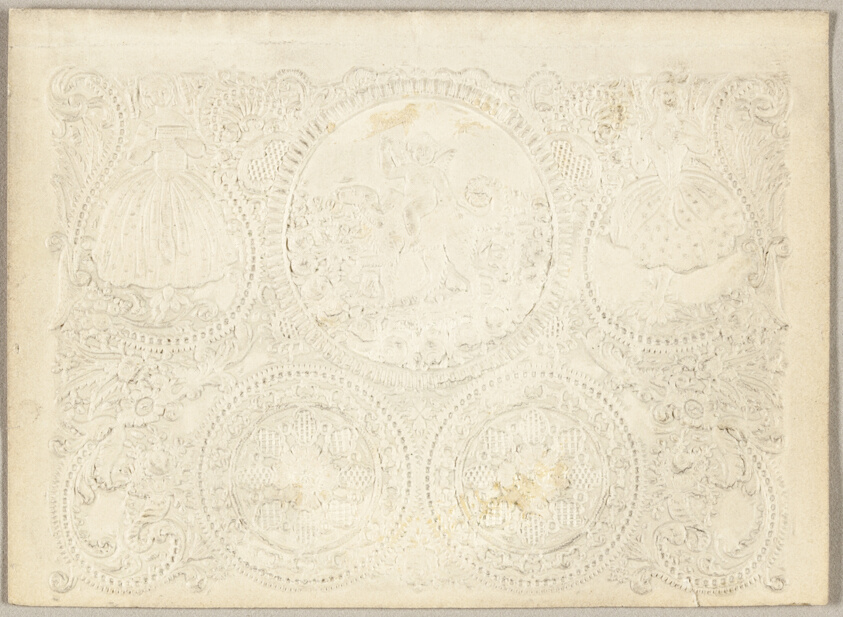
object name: Print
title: Untitled Valentine (Cupid on the Back of a Dog)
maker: George Meek (English, 19th century)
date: 1850/59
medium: Embossed (designed) ivory wove paper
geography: England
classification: collage; valentine; prints and drawing; print